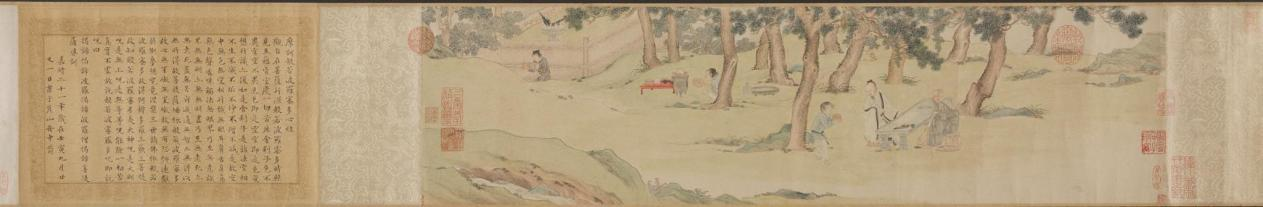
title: Zhao Mengfu Writing the Heart (Hridaya) Sutra in Exchange for Tea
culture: China, Ming dynasty (1368–1644)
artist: Qiu Ying (Chinese, 1494–1552)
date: 1542–43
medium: handscroll, ink and light color on paper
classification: Painting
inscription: Inscription accompanying text of "Heart" sutra, by Wen Zhengming 文徵明 (1470-1559): Zhengming 徵明, written in a boat at Kunshan 崑山, on the twenty-first day of the ninth month, in the renyin 壬寅 year, the twenty-first year of the Jiajing era [1542].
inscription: Colophon by Wang Shih-mou: Chou Yü-shün [Feng-lai] of K'un-shan was a scholarly, refined connoisseur of antiquities. He had acquired the poem written by Chao Ch'eng-chih [Chao Meng-fu] about the exchage of tea for Chao's calligraphy of the Prajna sutra. But the sutra itself, also written by Chao Meng-fu, is lost. He therefore asked Ch'iu Shih-fu [Ch'iu Ying] to do a painting and had Wen Cheng-ming, the artist-in-attendance, write the Hridaya Sutra in the "small, regular" style for replacement. Both works are so excellent that even Chao Meng-fu himself would certainly applaud if he should be reborn to see them. I, Shih-mou, had gotten possession of this scroll from the family of Chou Yü-shün, and since it was so wonderfully matched with one of the treasures in my collection. the Hridaya Sutra written by Chao Meng-fu for Priest Li in "running script," like the reuniting of two halves of a jade pi, I completed the scroll with the several colophons written for the "tea-exchange" poem. I did this because the painting of Ch'iu Ying and the calligraphy of Wen Cheng-ming are definitely masterpieces by themselves with absolutely no need to depend on any of the colophons written for the Chao Meng-fu poem. Furthermore, the two sons of Wen Cheng-ming, Shou-ch'eng [Wen P'eng] and Hsiu-ch'eng [Wen Chia]. have each written a colophon explaining the reason for replacing the calligraphy. As their writings are both acceptable for high standard, I didn't want to throw them away. [So by separating these into two scrolls] I was able to get two complete works of art in one clever stroke. I was quite pleased with myself, and hope that those who see this scroll shall not get suspicious because of the missing colophons. Wang Shih-mou wrote in his Jih-sun-chai study, on the first day of the tenth month, in the chia-shen year of the Wan-li era [1584].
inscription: Colophon by Wen P'eng: I-shao [Wang Hsi-chi] wrote in exchange for a flock of geese. Su Tung-po wrote in exchange for meat. Both episodes have become legends of a thousand years. Sung-hsüeh [Chao Meng-fu] "teased" Priest Kung for tea, and the story was immediately immortalized in the poems by all the famous scholars of the times. Indeed, how could one say his humor and elegance are not equal to the ancient worthies? Unfortunately, the poetry has survived but the writing of the sutra is lost. Yü-shün [Chou Feng-lai] therefore asked my father to make up the writing and so here is the complete work of art. Respectfully inscribed by Wen P'eng in the mid-summer of 1543.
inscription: Colophon by Wen Chia: Sung-hsüeh [Chao Meng-fu], in exchanging tea leaves for his writing of the Prajna, had put himself in the company of Yu-chün [Wang Hsi-chih] who exchanged geese for his writing of the Huang-t'ing sutra [the Yellow Chamber, or the Wai-ching ching, a Taoist text attributed to the Yellow Emperor]. However, was this romantic and cultivated gesture really intended for such small things? Actually, he was only proud that the excellence of his calligraphy had made him worthy to be the successor of the Ch'in Dynasty master. Since, very unfortunately, Chao Meng-fu's writing [of the Prajna] was already lost, my father therefore agreed to replace it, and did the calligraphy in the style of the Yellow Chamber. In addition, Yu-shün [Chou Feng-lai] had asked Mr. Ch'iu Shih-fu [Ch'iu Ying] to do a painting of the sutra writing story in the style of Li Lung-mien at the head of the scroll. Now it would seem the entire episode should go down in history for immortality. Respectfully recorded by Wen Chia, on the eighth day of the eighth month, in the year of k'uei-mao [1543]. trans. WKH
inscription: 4 colophons and 23 seals: 1 colophon, dated 1543, and 2 seals of Wen Peng (1498-1573); 1 colophon, dated 1543, and 2 seals of Wen Chia (1501-1583); 1 colophon, dated 1584, and 3 seals of Wang Shih-mou (1536-1588); 2 seals of Chou Feng-lai (16th c.); 3 seals of Sung Lo (1634-1713); 5 seals of the Ch'ien-lung emperor (r. 1736-95); 1 colophon, dated 1902, and 1 seal of Fei Nien-tz'u (1885-1905); 4 seals of Wan-go H. C. Weng (b. 1918); 1 seal unidentified.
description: The Yuan dynasty calligrapher Zhao Mengfu (1254–1322) is said to have transcribed the Heart Sutra for a certain priest named Li in exchange for tea. Later, during the Ming dynasty, the professional painter Qiu Ying from Suzhou painted this scene for his patron. Here, Zhao Mengfu holds a brush and has a piece of paper laid out before him. On the table is an ink stone, an ink stick, and a small water dropper. Drops of water would dissolve the ink stick into liquid ink when it was ground on the flat square stone.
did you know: Qiu Ying was born to a peasant family, but his natural talent led him to a successful career as a professional painter with wealthy patrons.